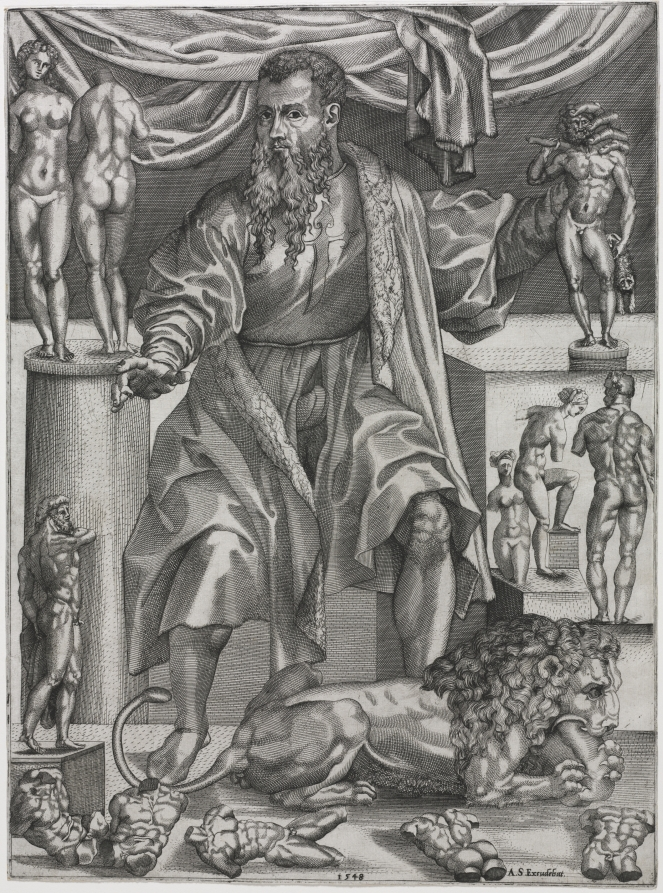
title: Portrait of Baccio Bandinelli with Lion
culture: France, 16th century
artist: Nicolo della Casa (French, active 1543–48)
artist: after Baccio Bandinelli (Italian, 1493–1560)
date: 1548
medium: engraving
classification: Print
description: Florentine sculptor Baccio Bandinelli was a self-proclaimed rival of Michelangelo. This print, made from Bandinelli’s design, is a masterpiece of self-promotion that also encapsulates the Renaissance artist’s inspiration from antiquity and rising social status. Bandinelli portrayed himself sitting like a king surrounded by both ancient sculpture and his own works. The lion that bites into a block of marble symbolizes Bandinelli’s formidable power over the stone and perhaps the triumph of his skills over all others (including Michelangelo). His fur-lined cloak is that of a gentleman, and the cross on his chest indicates his knighthood in the Order of Saint James, a Catholic chivalric brotherhood.